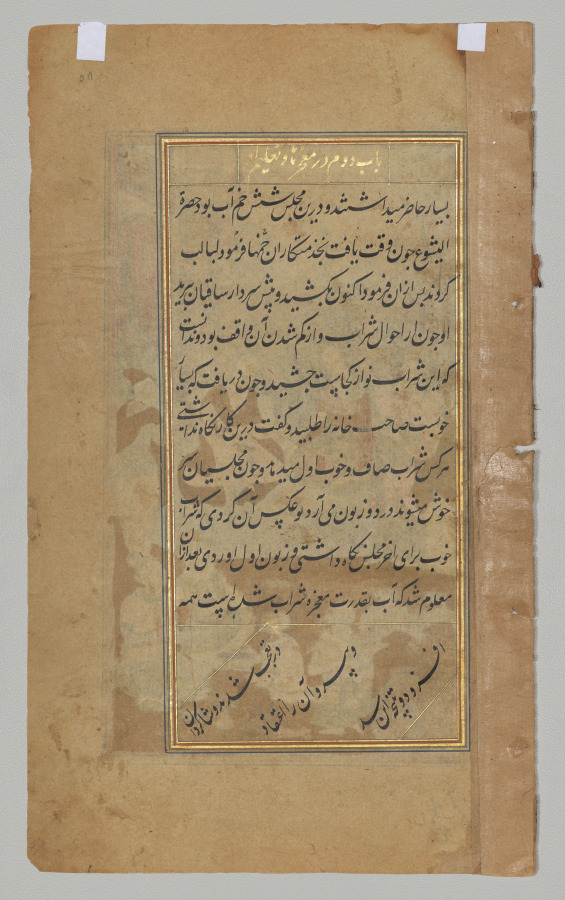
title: The Marriage at Cana (folio 58 verso), from a Mirror of Holiness (Mir’at al-quds) of Father Jerome Xavier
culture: Mughal India, Allahabad, made for Prince Salim (1569–1627)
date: 1602–4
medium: Gum tempera, ink, color, and gold on paper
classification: Manuscript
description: Mary and Jesus sit in places of honor at the wedding of her relatives in Cana in front of a building facade ornamented at the top with charming rows of animal faces. The text specifies that there were six water jars at the gathering, as depicted in the lower left. The wine master in the yellow tunic gestures to the jars, as he admonishes the host for saving the good wine for last. The dumbstruck host, who knew there was no more wine, has discovered that Jesus miraculously transformed the water into wine. The figure wearing the crimson velvet hat with his hand on the host’s shoulder is probably the groom. The miracle inspired him to leave his bride a virgin and follow Christ as the apostle John.